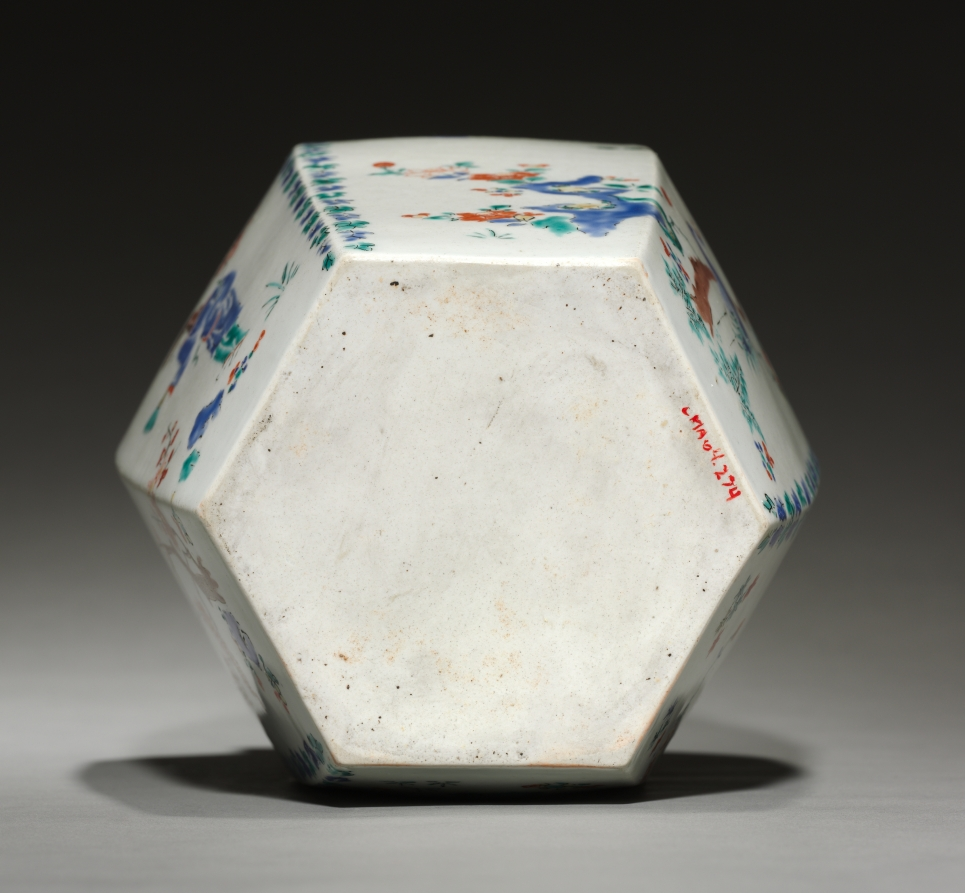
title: Hexagonal Jar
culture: Japan, Edo period (1615–1868)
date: late 1600s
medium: One of a pair; porcelain with overglaze color enamel and gold decoration (Hizen ware, Kakiemon type)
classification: Ceramic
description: This kakiemon-type jar with plum design is a product made for the European markets. Here, Japanese kakiemon potters transformed the typical plum, bamboo, and pine motifs into a theme appreciating the plum. The 9th-century Japanese scholar and politician Sugawara Michizane established the plum as a symbol of scholarship. An excellent poet, particularly of Chinese-style poetry, he was also well known for his love of plum blossoms. Later, the plum came to represent tenmangu, a shrine for Sugawara.